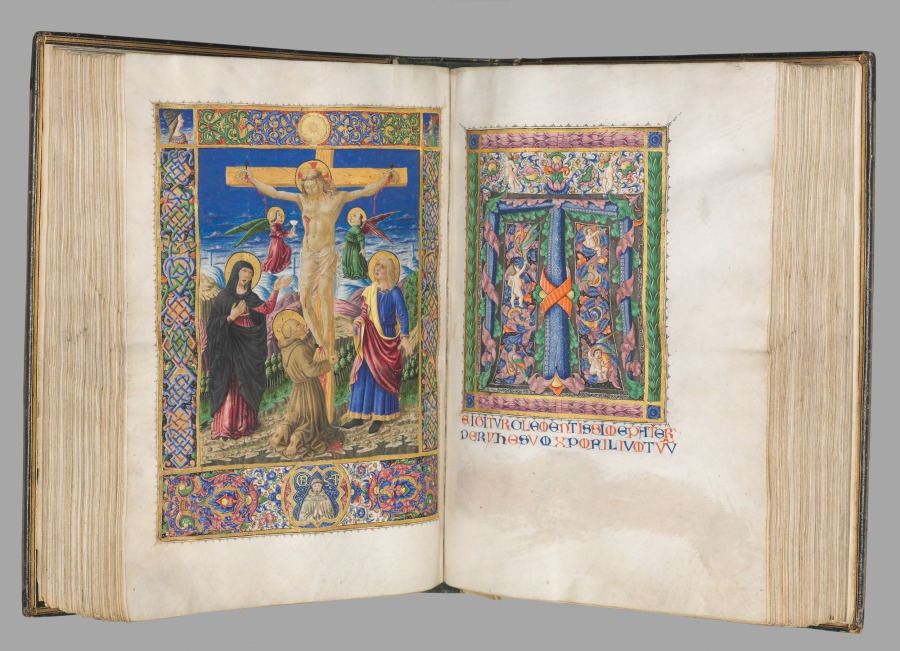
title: The Caporali Missal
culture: Italy, Perugia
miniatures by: Bartolommeo Caporali (Italian, c. 1420–1503)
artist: assisted by Giapeco Caporali (Italian, d. 1478)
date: 1469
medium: Ink, tempera and gold on vellum; 400 folios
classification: Bound Volume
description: Called a missal, this manuscript served as a liturgical service book used by the priest at the altar during Mass. According to a colophon, an inscription on folio 400, the missal was made for the Franciscan church of San Francesco in Montone, near Perugia in the region of Umbria, in 1469. It was illuminated by Bartolomeo and Giapeco Caporali, two artist brothers who collaborated on the page decorations. The missal is opened here to the volume’s masterpiece, a two-page deluxe opening to the Canon of the Mass with a Calvary scene. The Canon introduces the most solemn part of the Mass during which the priest elevates and consecrates the Eucharistic bread and wine. Saint Francis kneels at the foot of the cross, attesting to the missal’s Franciscan use and affiliation.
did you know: Bartolomeo Caporali and his brother Giapeco shared a house and a workshop in Perugia.